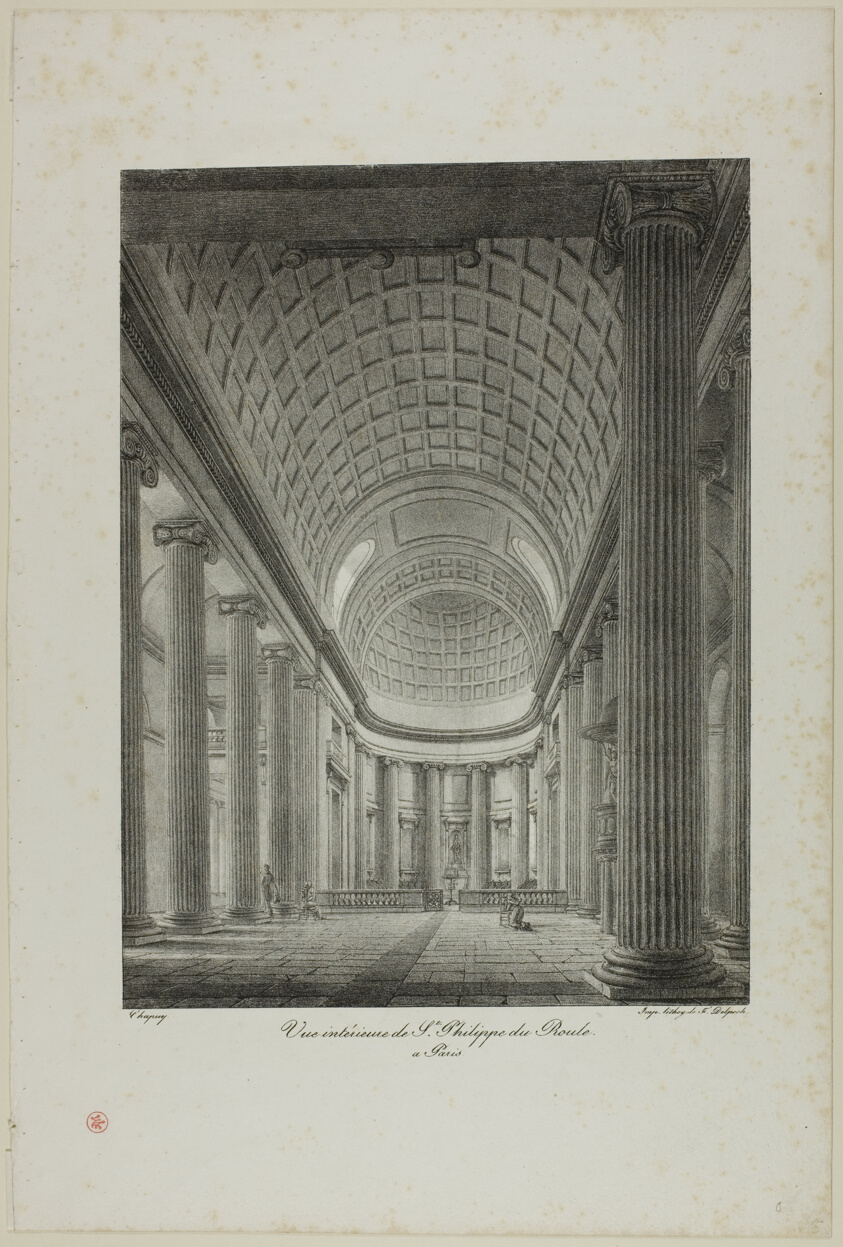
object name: Print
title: Interior View of St. Philippe du Roule, Paris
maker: Nicolas Chapuy (French, 1790-1858); printed by Francois Seraphin Delpech (French, 1778-1825)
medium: Lithograph in black on ivory wove paper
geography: France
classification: lithograph; print; prints and drawing